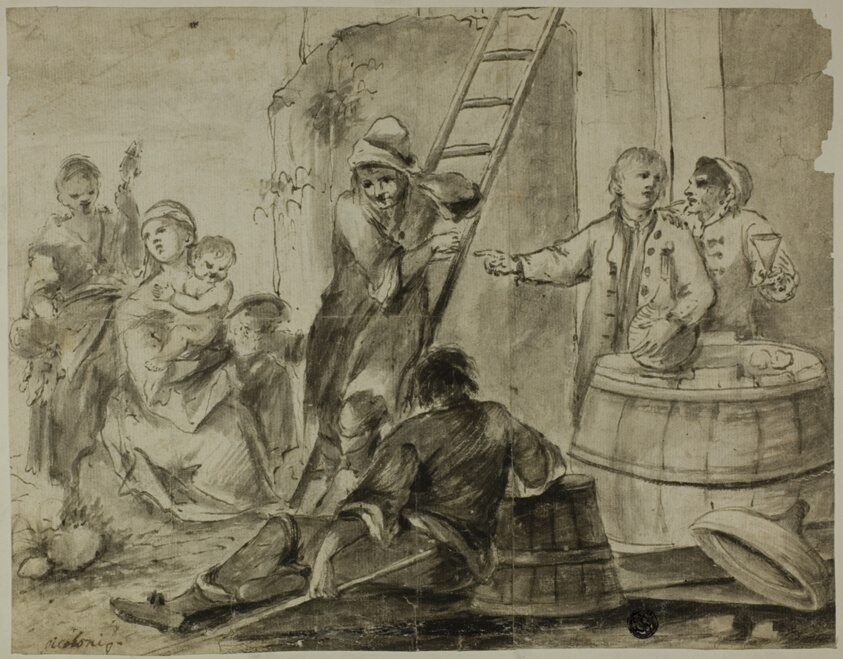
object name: Drawing and Watercolor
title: Rustic Scene: Men, Women and Children Resting and Drinking Outside Building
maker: Giorgio Giacoboni (Italian, died 1777)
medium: Pen and gray-brown ink, with brush and gray-brown wash, over traces of black chalk, on cream laid paper, laid down on board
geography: Italy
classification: ink or chalk wash; drawings (visual works); prints and drawing